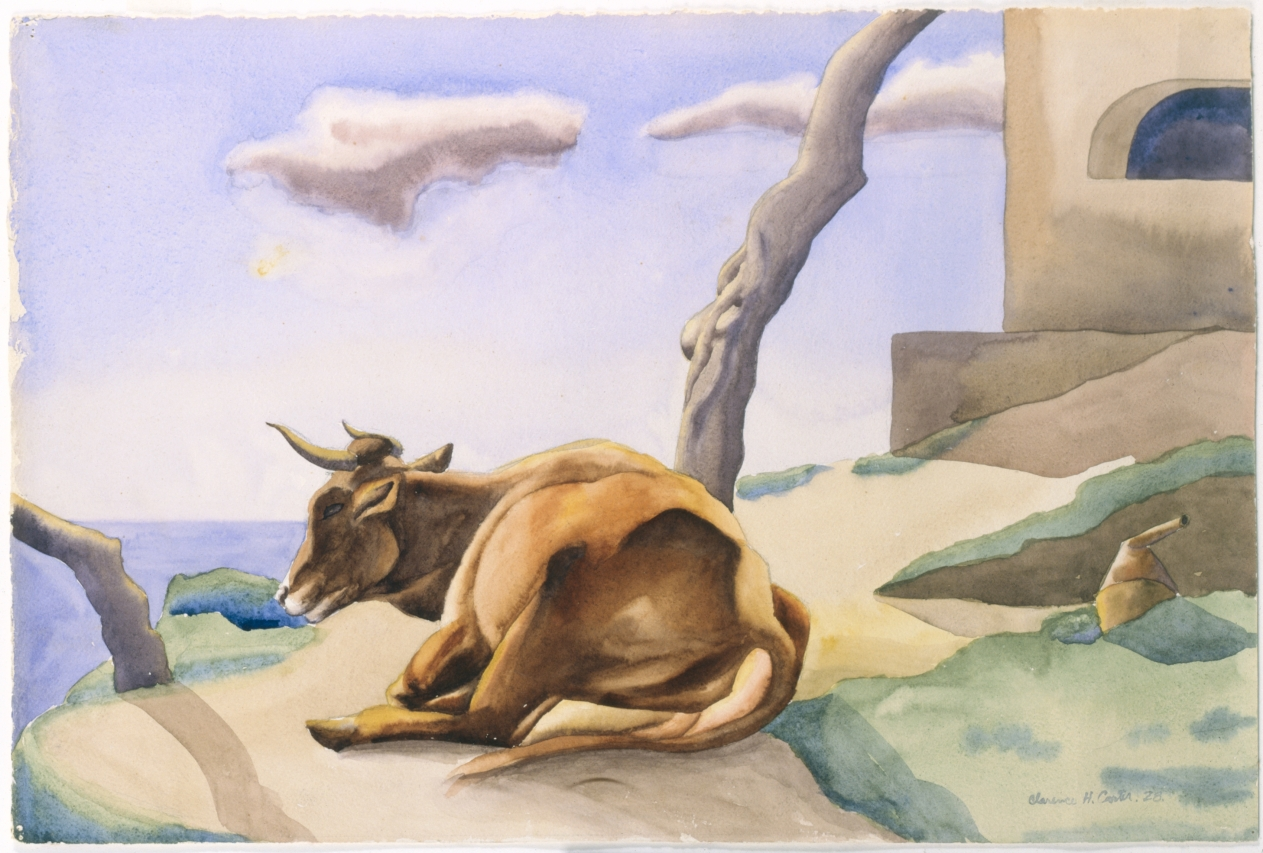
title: The Patient Cow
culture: America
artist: Clarence Holbrook Carter (American, 1904–2000)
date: 1928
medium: watercolor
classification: Drawing